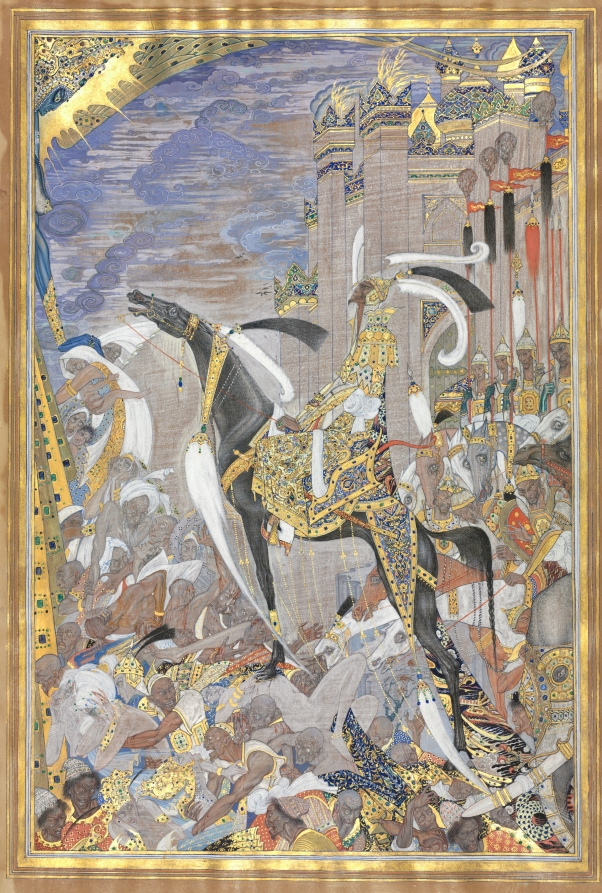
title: Victorious Army Entering City After Siege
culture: Pakistan (?), 20th century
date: 1700s-1800s(?)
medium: Gum tempera and gold on paper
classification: Painting